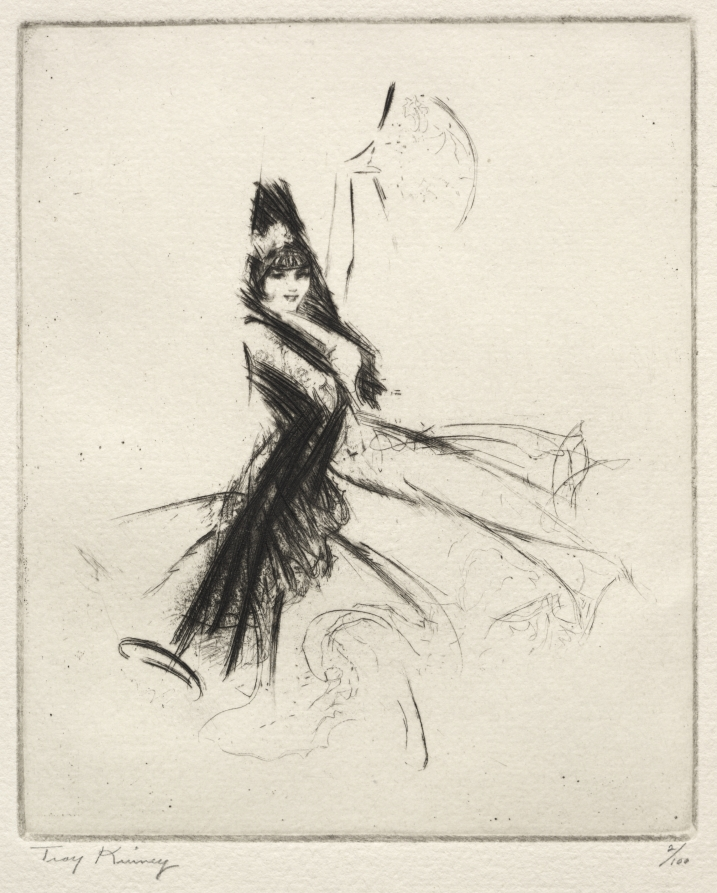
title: Tortola Valencia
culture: America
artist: Troy Kinney (American, 1871–1938)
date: 1918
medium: etching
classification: Print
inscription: Signed in pencil on bottom left beneath image: Troy Kinney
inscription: Signed in pencil on bottom right beneath image: 2/100